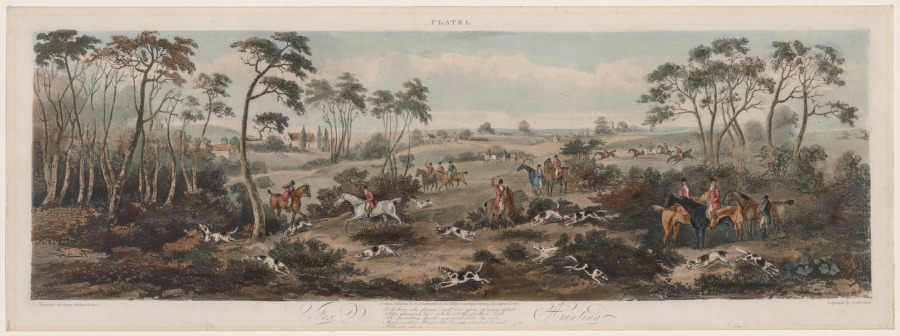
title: Fox Hunting, No. 1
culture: England, 19th century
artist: Thomas Sutherland (British, 1785–1838)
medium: aquatint and etching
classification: Print